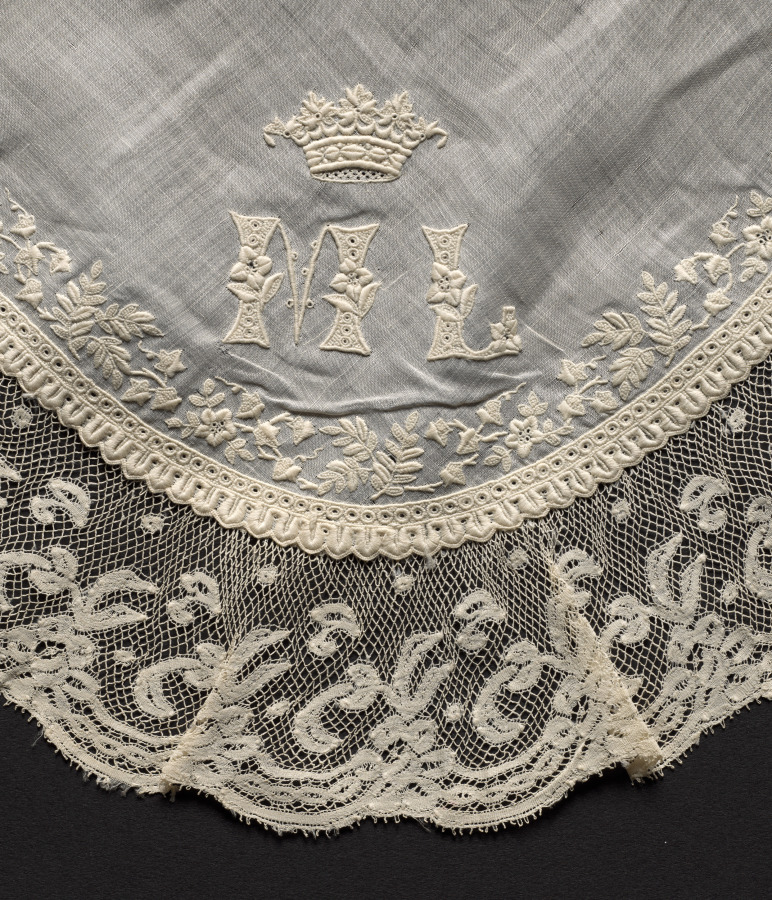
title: Lace Handkerchief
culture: Switzerland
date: 1800–1820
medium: Plain weave linen center: bobbin lace (Valenciennes) and embroidered edging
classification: Embroidery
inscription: in one corner "M.L." with coronet above.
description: In one corner, this handkerchief has a monogram with the initials M. L. There is a coronet above the initials.